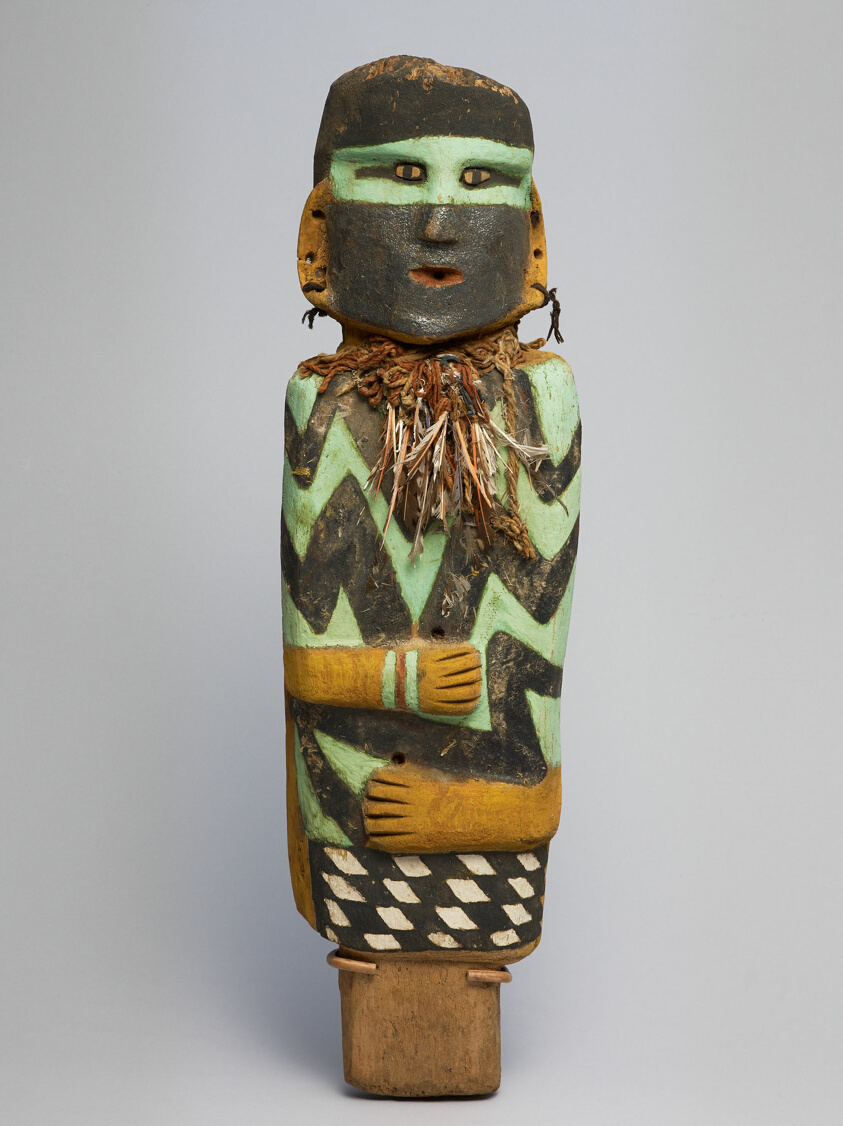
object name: Religious/Ritual Object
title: Ritual Cache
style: salado, mimbres, mogollon, americas, southwest, native american, native north american, Arts of the Americas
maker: Salado branch of the Mogollon; New Mexico, United States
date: 1300–1400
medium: Wood, stone, plant fibers, cotton, feathers, hide, and pigment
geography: New Mexico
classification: ceremonial object; ceramics; masks; ritual objects; art of the americas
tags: ceremonial objects, figures (representations), snakes, ritual objects, mountain lions, indigenous, nature, altar, offering, feathers, corn, lightning, fertility, supernatural, basketry, hunting